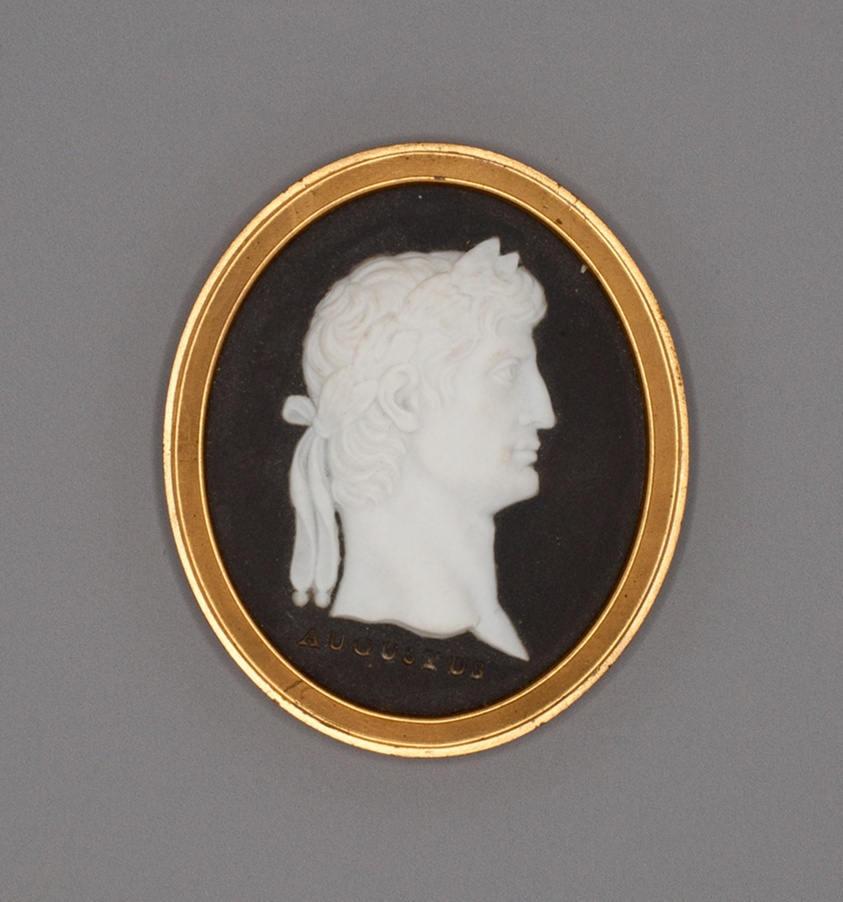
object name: Ceramics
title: Medallion with Augustus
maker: Wedgwood Manufactory (England, founded 1759)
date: Late 18th century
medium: Stoneware (jasperware)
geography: Burslem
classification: sculpture; stoneware; european decorative arts; ceramics